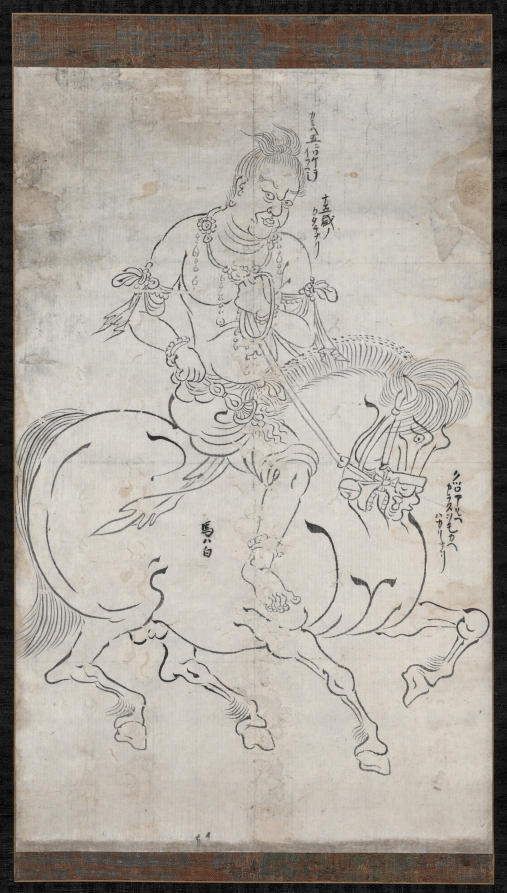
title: The Youth Seitaka (Seitaka Dōji)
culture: Japan, Heian period (794–1185)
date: 1164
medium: hanging scroll; ink on paper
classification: Painting